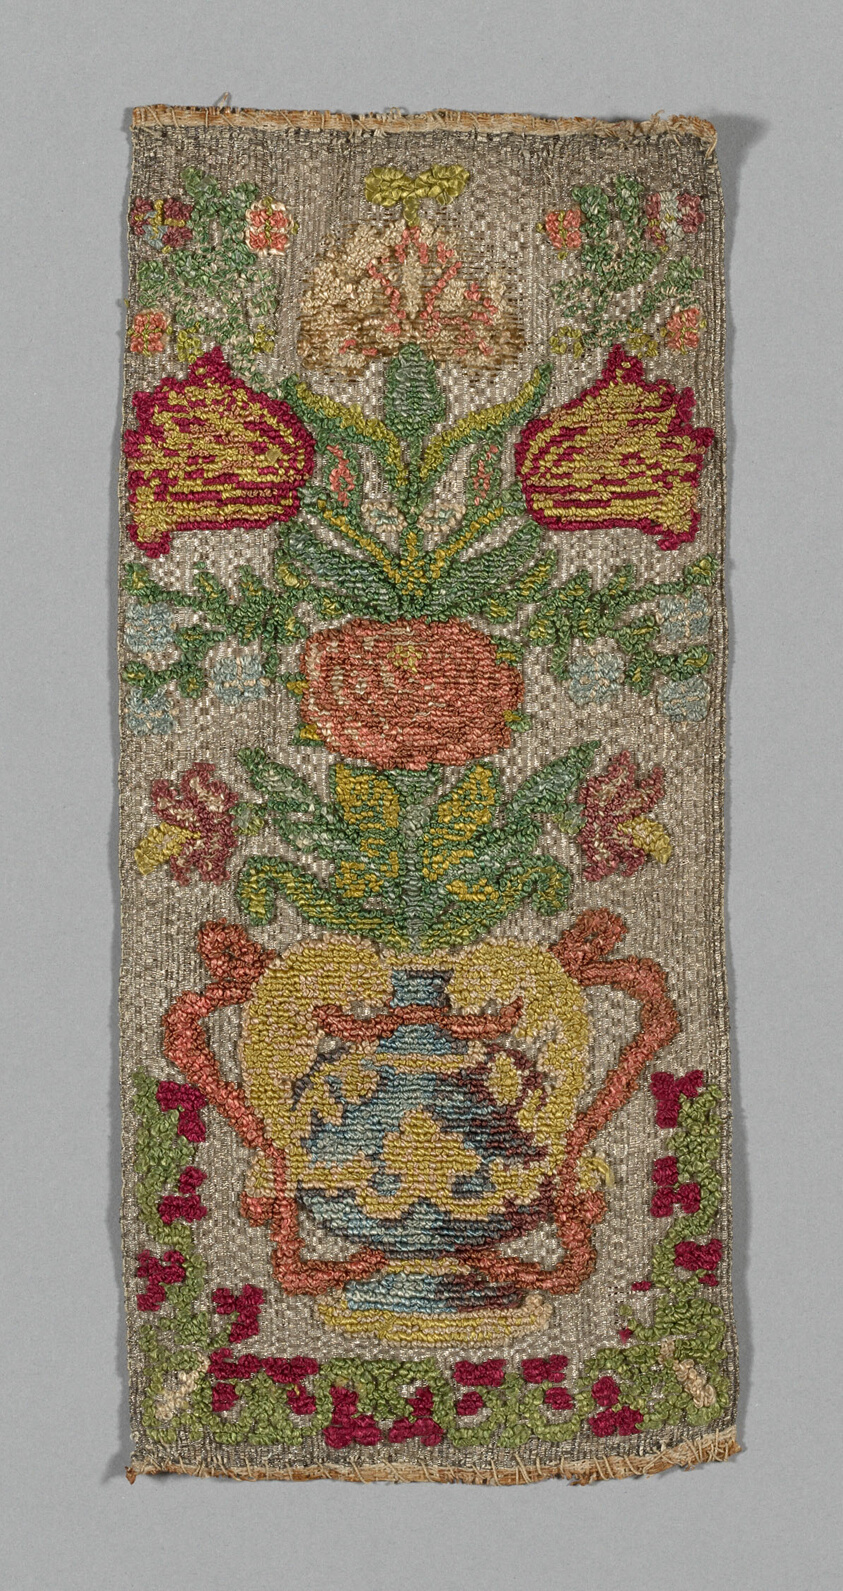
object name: Textile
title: Fragment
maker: Spain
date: 19th century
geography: Spain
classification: textile; weaving